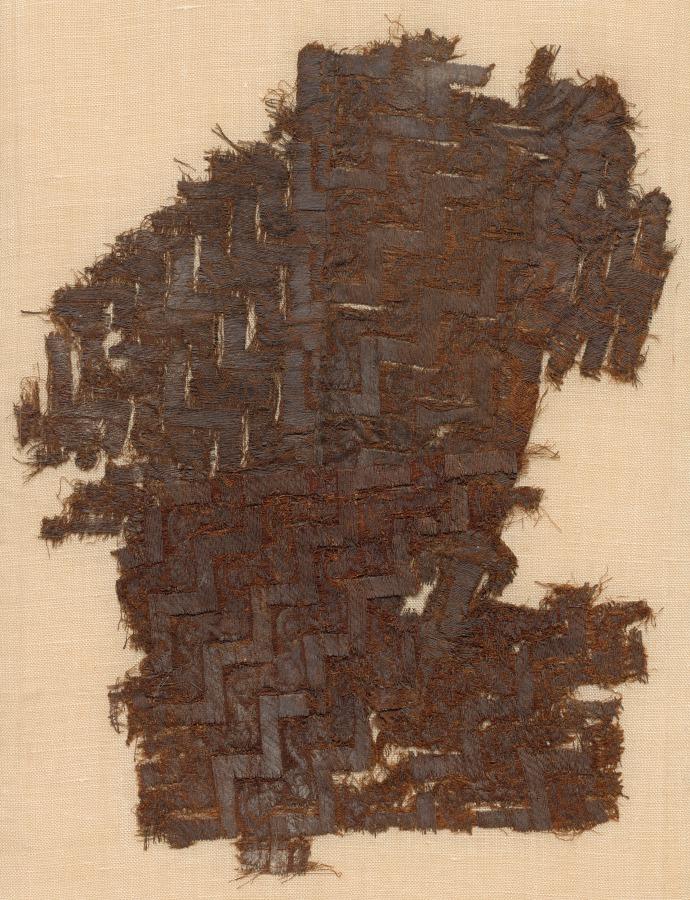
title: Fragment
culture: Unassigned, Probably Modern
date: before 1968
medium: silk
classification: Textile